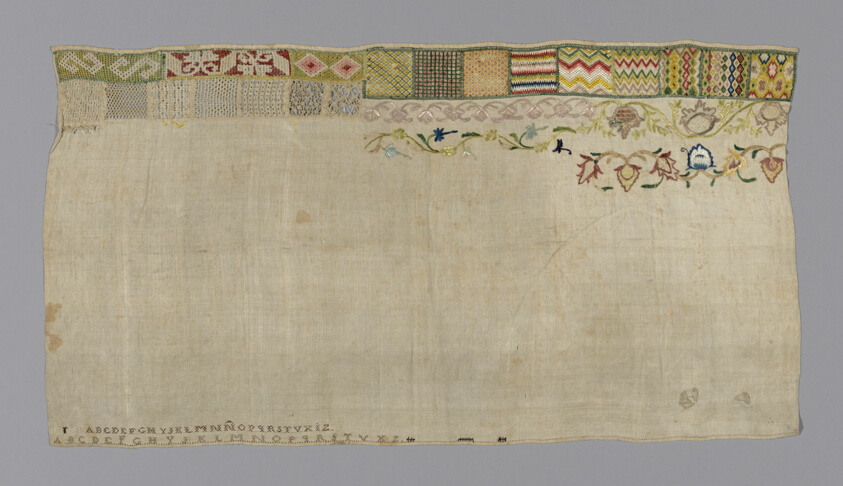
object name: Textile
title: Sampler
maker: Spain or Mexico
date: 19th century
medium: embroidery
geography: Spain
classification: textile; needlework (visual works); sampler